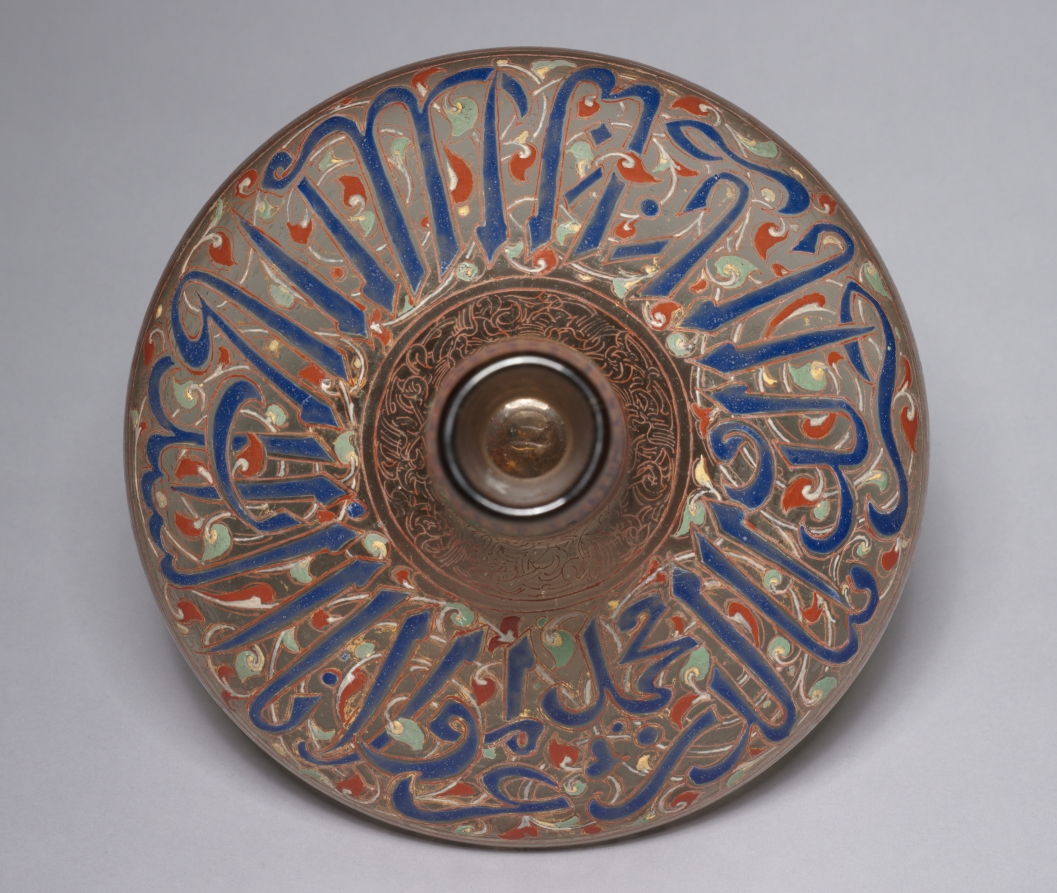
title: Bottle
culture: Europe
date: c. 1900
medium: glass with enameled and gilded decoration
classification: Glass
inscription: The inscription translates: "Glory to our lord, the sultan, the king, the victorious, the protector of the world and the religion, Muhammed."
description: The bold inscription on the body of the bottle translates: “Glory to our lord, the sultan, the king, the victorious, the protector of the world and the religion, Muhammad.” The sultan referred to here is the Mamluk ruler Muhammad ibn Qala’un (1285–1341), who is also referenced on the nearby mosque lamp. This bottle, as with the mosque lamp CMA 1981.10, is representative of reproductions of Mamluk glass that were prominent in the late 1800s in Europe during a period of resurgence of interest in Islamic art. At this time, collectors and artists revived the techniques of enameling and gilding that are hallmarks of Mamluk glass.